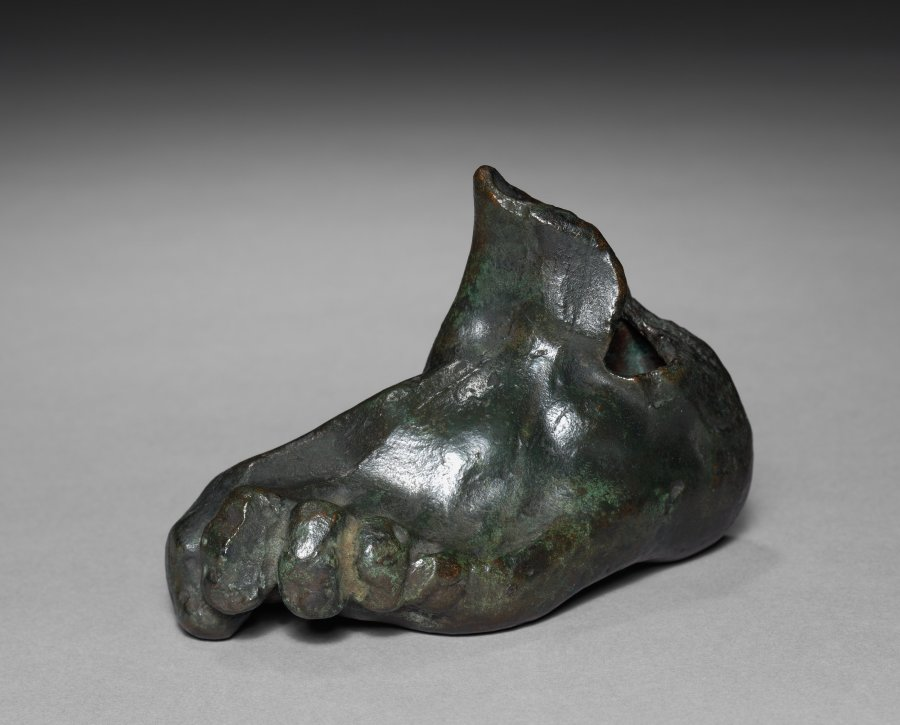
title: Model of a Foot (left foot)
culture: France, late 19th-early 20th Century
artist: Auguste Rodin (French, 1840–1917)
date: c. 1880 – 1917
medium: bronze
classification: Sculpture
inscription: Signed: "A. Rodin"